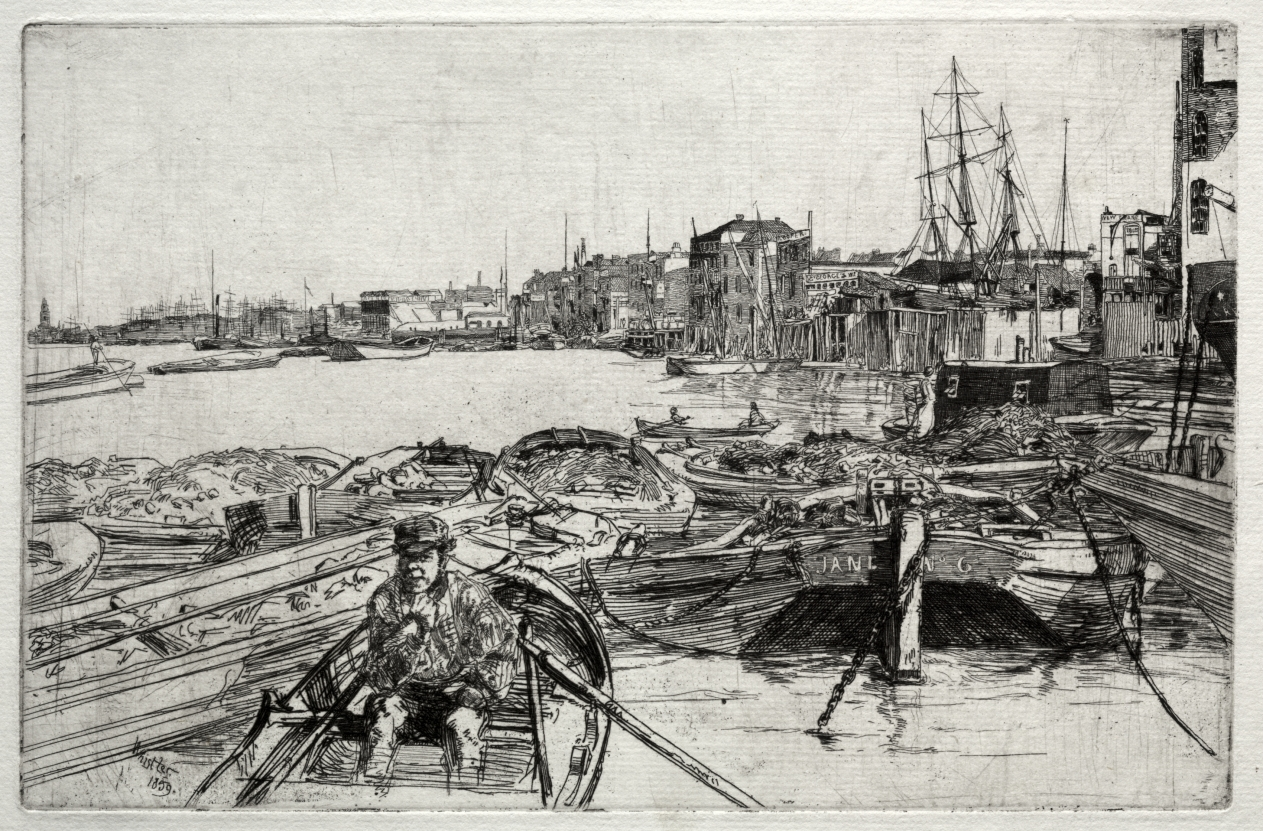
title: The Pool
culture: America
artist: James McNeill Whistler (American, 1834–1903)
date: 1859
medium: etching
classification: Print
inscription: signed lower left on plate: Whistler 1859